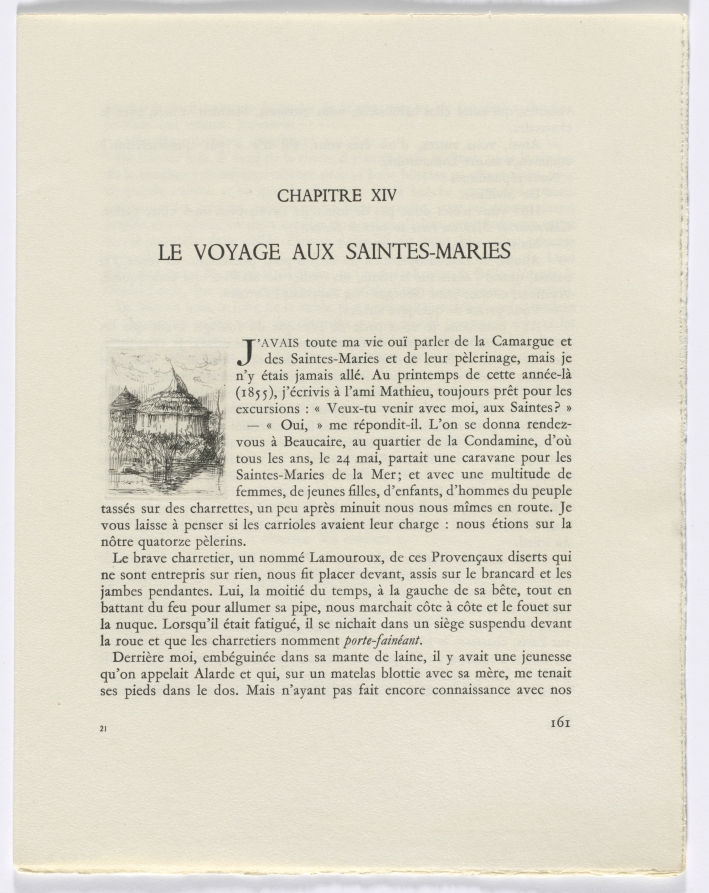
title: Frédéric Mistral: Mémoires et Recits by Frédéric Mistral: round building (page 161)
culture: France, 20th century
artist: Auguste Brouet (French, 1872–1941)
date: 1937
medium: etchings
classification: Portfolio